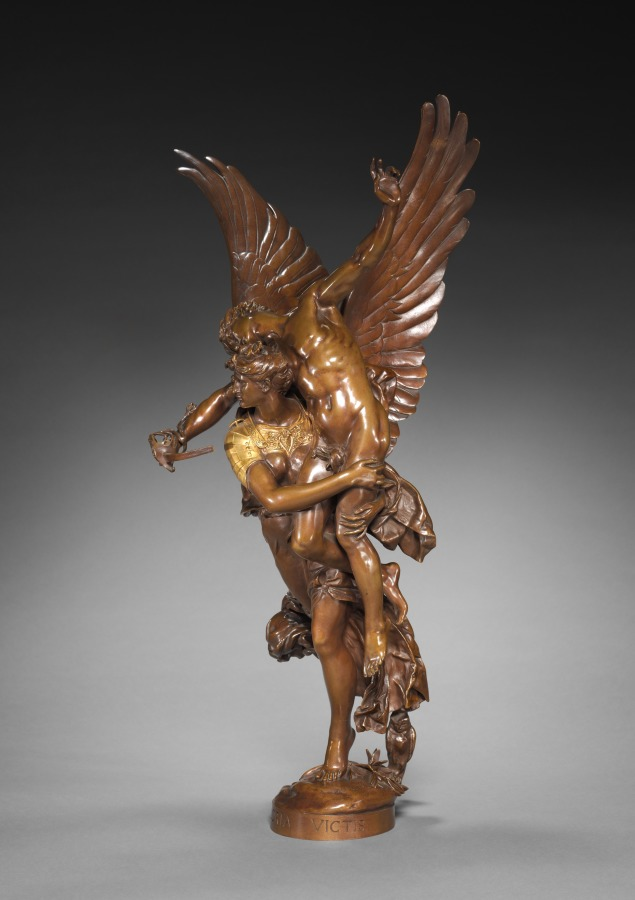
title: Gloria Victis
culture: France, 19th century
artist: Antonin Mercié (French, 1845–1916)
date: c. 1880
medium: bronze with gilding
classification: Sculpture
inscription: Signed near foot at right: "A. MERCIE."; inscribed rear: "F. BARBEDIENNE. FONDEUR."; inscribed front of base: "GLORIA VICTIS."